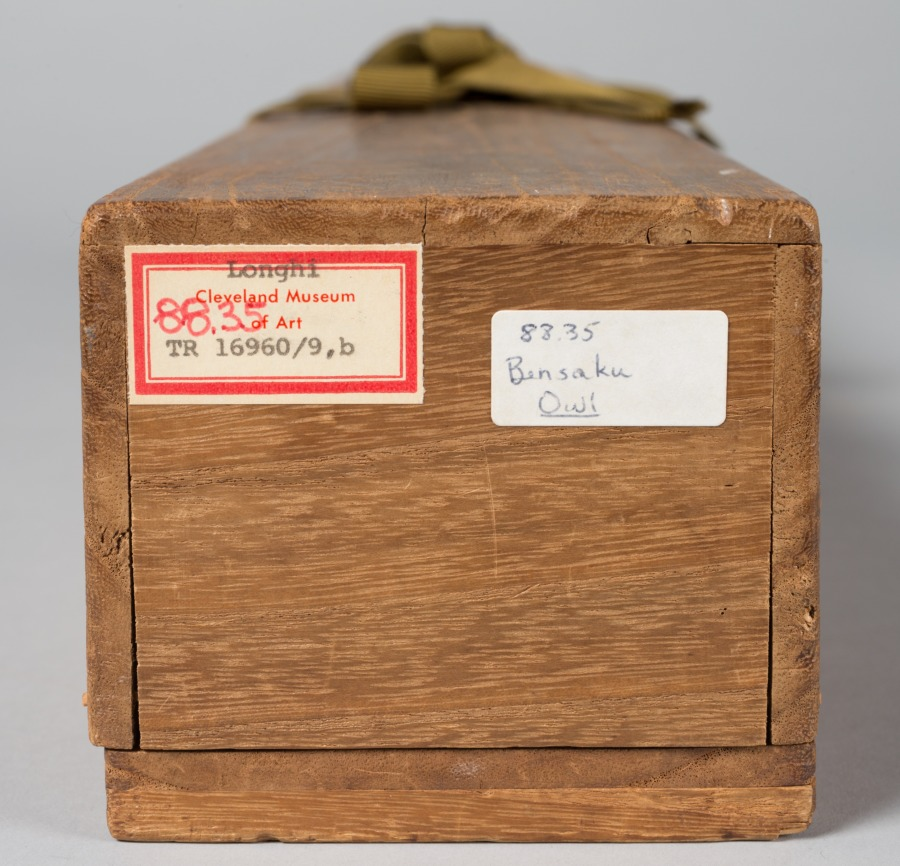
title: Owl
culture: Japan, Edo period (1615–1868)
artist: Tsuda Bensaku (Japanese, active 1620s–40s)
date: 1630s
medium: hanging scroll; ink and slight color on paper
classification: Painting